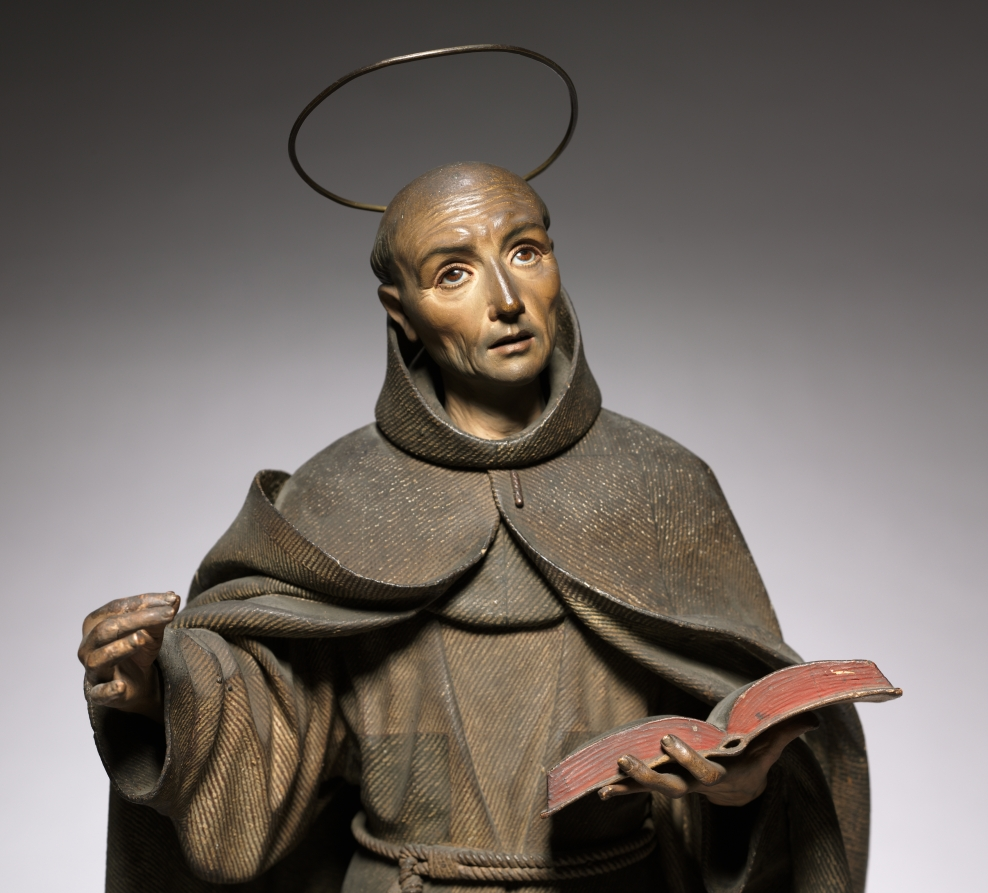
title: Saint Peter of Alcántara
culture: Spain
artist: Pedro de Mena (Spanish, 1628–1688)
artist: and Workshop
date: c. 1663–70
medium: painted wood, with ivory and glass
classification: Sculpture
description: Painted wood sculpture from Spain in the 1600s involved a team of artisans working under a lead sculptor. The sculptor first carved numerous pieces of wood in complex forms. So the paint would stick properly, these fragments were delicately covered in gesso (a combination of white chalk and glue made from animal collagen), preserving the subtle woodcarving underneath. The rough surface of the saint's face—reflecting his age and hardships—came from texturing the gesso with a brush. The glass eyes, probably imported from Venice, were inserted from behind the face before the wood pieces were attached. Finally, the eyelashes were added for a further touch of realism. A painter created the appearance of coarse sackcloth in a distinctive style, with yellow strokes rising off the surface. Smoother brushstrokes form the flesh tones, even revealing the saint's five-o'clock shadow. Unlike other kinds of painting, sculpture from southern Spain at this time was usually not covered in varnish; sculptors prized the unvarnished paint for its realistic effect, although it makes the surface exceptionally delicate and susceptible to dust and dirt, which more easily sticks to the surface.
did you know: Peter of Alcantara was so dedicated to his work he slept only 90 minutes a night--he's the patron saint of night watchmen!